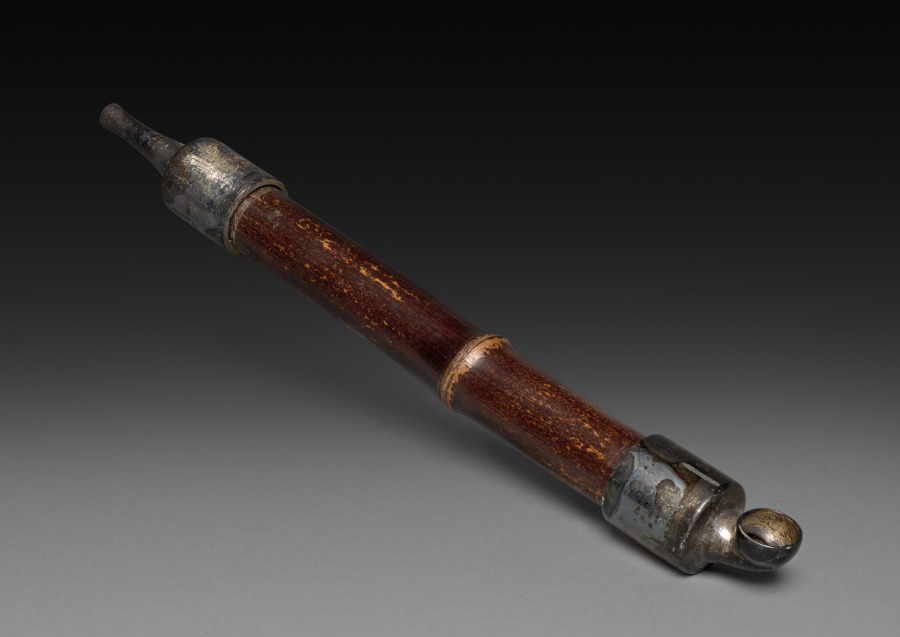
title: Tobacco Pipe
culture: Japan, Edo period (1615–1868)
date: 1700s–mid-1800s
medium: bamboo and silver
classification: Miscellaneous